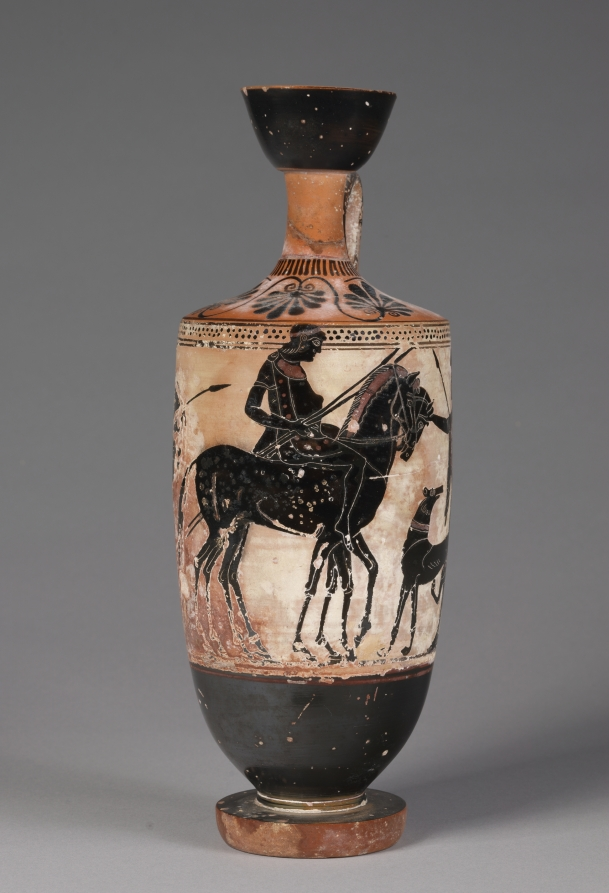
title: Black-Figure White-Ground Lekythos (Oil Vessel): Horseman, Horse between Warriors, Dog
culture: Greek, Attic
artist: attributed to Edinburgh Painter (Greek, Attic, active c. 505–485 BCE)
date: c. 500 BCE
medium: ceramic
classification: Ceramic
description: Two armed warriors, each wearing a crested helmet and holding a spear and shield, flank a mounted horseman, who leads another horse. The warrior at right reaches up with one hand to the head of the second horse, raising the question of how he still holds his spear. Below, a dog twists to scratch itself and look back, its right hind foot apparently resting on one of the warrior’s.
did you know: The Edinburgh Painter was the first artist to paint black-figure decoration on a white ground.